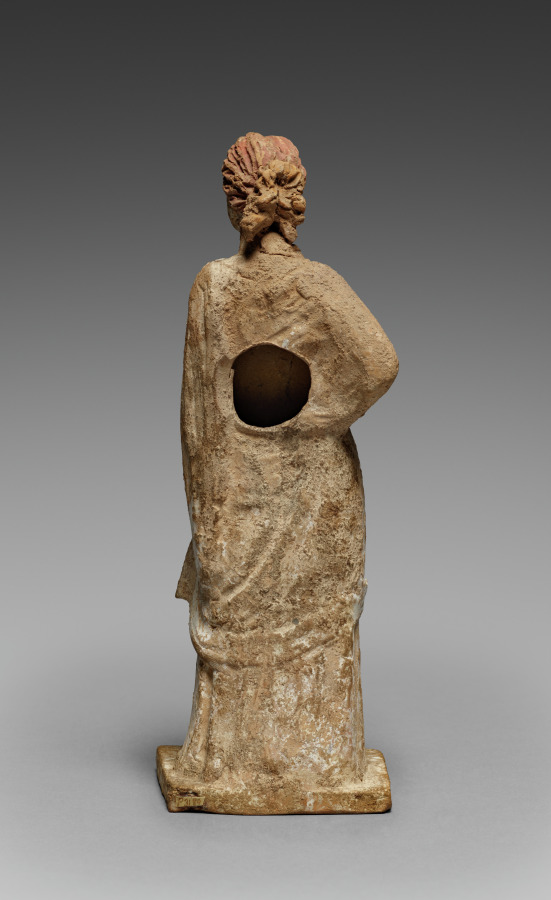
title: Female Figurine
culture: Greece, Tanagra (Boeotia)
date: 330–200 BCE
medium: molded terracotta, painted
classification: Sculpture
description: This figurine depicts an elegantly draped young woman wearing a cloak or himation over a dress called a chiton. The contrast between her sharp elbow and flowing skirts illustrates an interest in the stretch and fold of different fabrics. Originally brilliantly painted, this figurine still has traces of color such as the red hair and the white on her face. The site of Tanagra in central Greece is known for its abundance of terracotta figurines like this one made by mixing and matching different molds.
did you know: This woman’s rolled hairstyle is now called a “melon coiffure.”